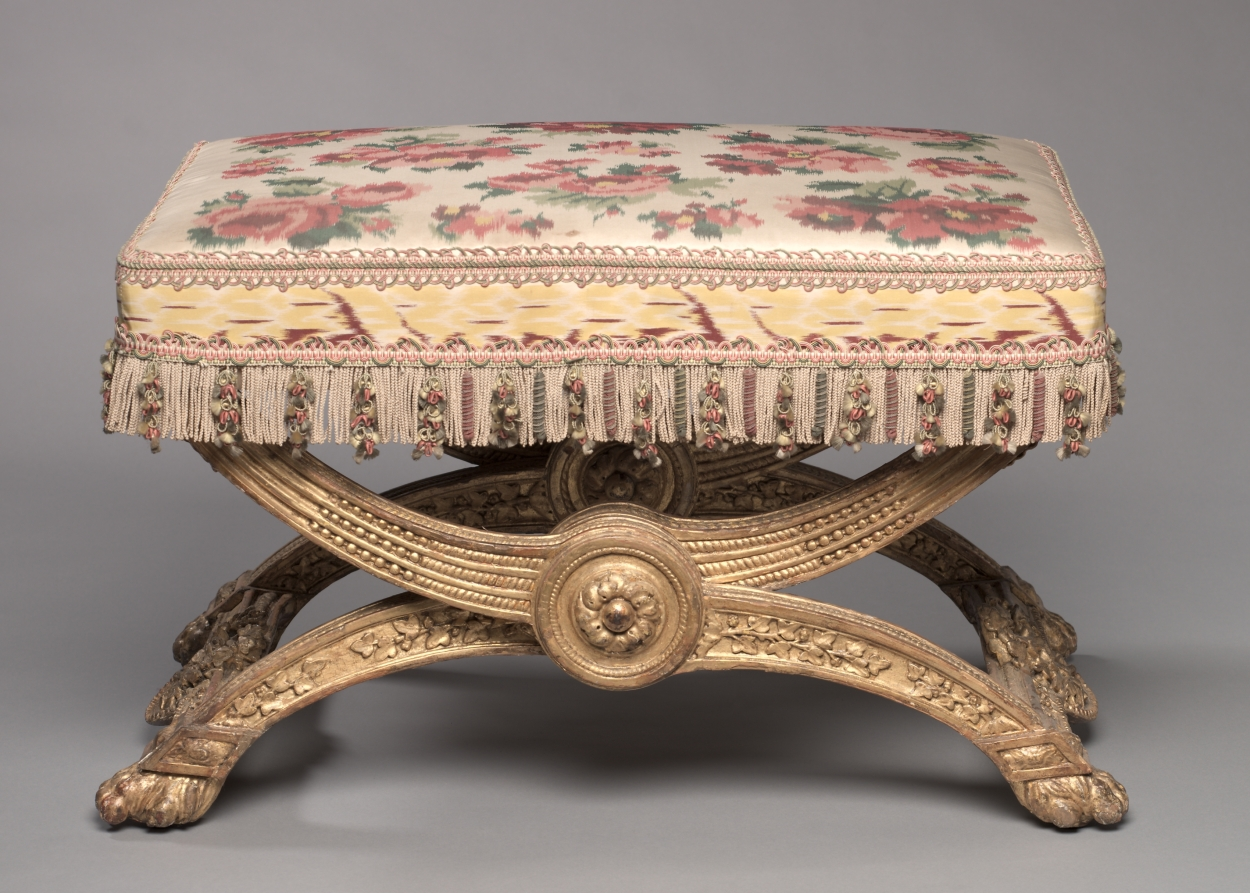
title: Stool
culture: France, 18th century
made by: Jean-Baptiste-Claude Sené (French, 1748–1803)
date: 1786–1787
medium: carved and gilded wood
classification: Furniture and woodwork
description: These stools were made for the gaming room of Marie-Antoinette at the Chateau de Compiègne and later placed in the Chateau de Fontainbleau.